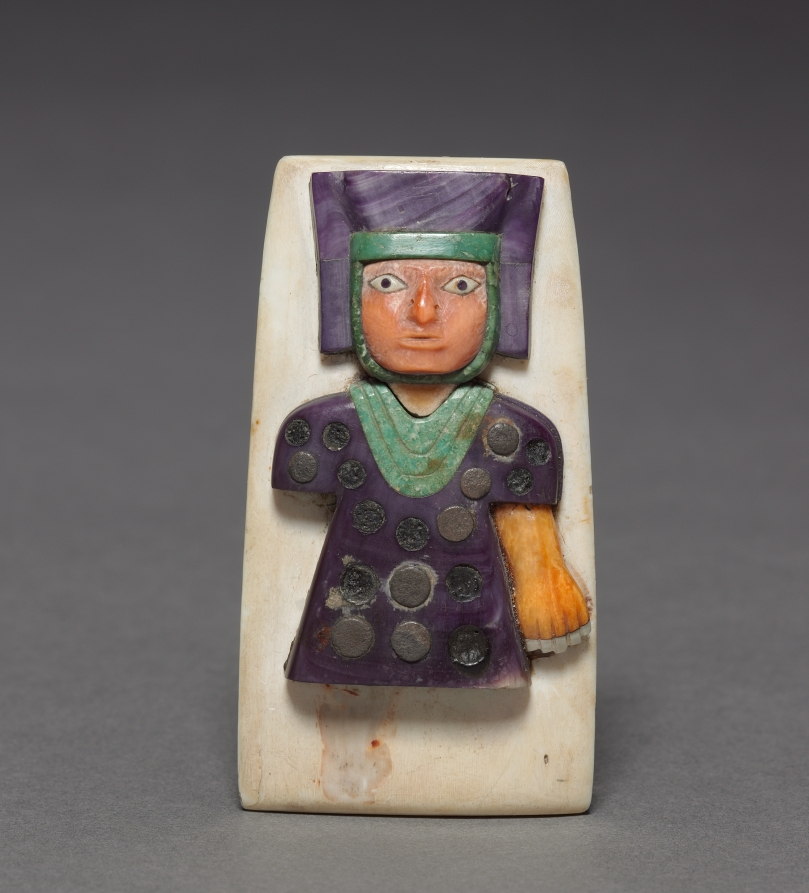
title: Ornament with Figure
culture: Central Andes, Wari style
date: 600–1000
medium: shell, stone, and metal (silver?)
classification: Jewelry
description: Affixed to a section of white shell is the image of a Wari dignitary, assembled of carefully carved mosaic elements. The purple and pink shapes are made of shell, while the green is serpentine. The spots on the figure's tunic are probably pyrite, which was originally smooth and reflective.